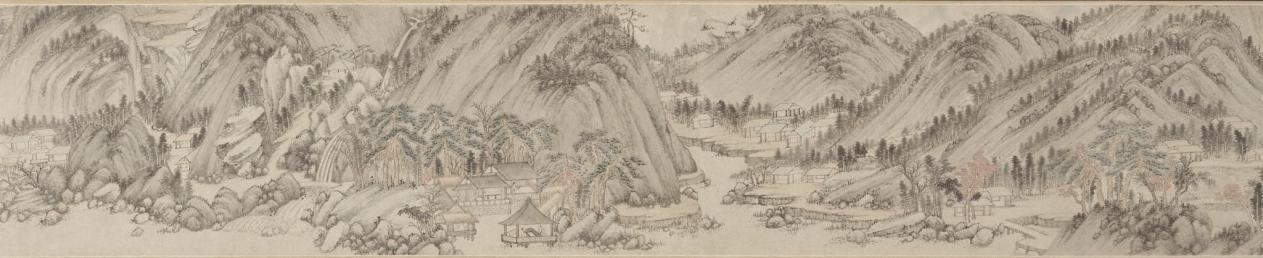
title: Mt. Taibo in the Style of Wang Meng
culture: China, Ming dynasty (1368–1644)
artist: Du Qiong (Chinese, 1396–1474)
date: 1442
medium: handscroll; ink and light color on paper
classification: Painting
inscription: Artist's inscription, signature, and 11 seals: [1 seal] Tung-yüan chai. Huang-ho-shan-ch'iao [Wang Meng] painted a painted called T'ai-po Mountain. Its brushwork is superior and admirable, which is very close to Yu-ch'en [Wang Wei, 699-759]. The cleverness of its composition, the maple groves and rustic temples, the inaccessible ravines and autumnal plateaus, the periolous peaks and strange rocks, etc., all seem to be so natural. The paper is only a little over eight feet, but the landscape has the range of a thousand miles. Once you open and note the contents, it is as if one were roaming among the mountain peaks enveloped in mist and clouds, and forgot the dusty world. When I first saw this, I was so mixed with excitement and joy that I could not take my hands off the painting. So I put it on the table, and tried my best to imitate it, forgetting sleeping and eating for about three months before it was completed. Although I do not dare to tread in the footsteps of Huang-ho shan ch'iao, I took great pains to capture his spirit in composition and colors. I do not know whether it would pass the judgment of the experts. On the fifteenth day of the fifth month, the seventh year of the Cheng-t'ung year [1442], inscribed by Tung-yüan, Tu Chiung. [2 seals] Yung-chia; Ching-chieh ming-men. [8 seals on painting] Tung-yüan chai; Ching-chieh ming-men; Yung-chia; Tu Ch'iung yin; Tung-yüan (repeated 5 times). trans. WKH/LYSL 3 colophons and 7 additional seals: 1 colophon and 2 seals of Chou Ting (1401-1487); 1 colophon and 2 seals of Wu K'uan (1435-1504); 1 colophon, dated 1655, and 2 seals of Lan Ying (1585-after 1664).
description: When a Chinese painter "imitated" a painting by a past master, the intention was never to produce an exact copy. Du Qiong, the Ming painter from Suzhou, is a case in point. The painting style of this handscroll is actually closer to that of Huang Gongwang (1269–1354) than to the style of Wang Meng (about 1301–1385). Both masters were active during the previous dynasty and are among the so-called Four Great Masters of the Yuan dynasty (1279–1368). In this painting, the interplay of styles, including Du Qiong's own, contribute to an inner dimension that is more than visual. Mt. Taibo is located in the province of Zhejiang and is known for its scenic beauty. In this scroll, however, it is not depicted literally. The image is an ideal representation of mountains in southeastern China.